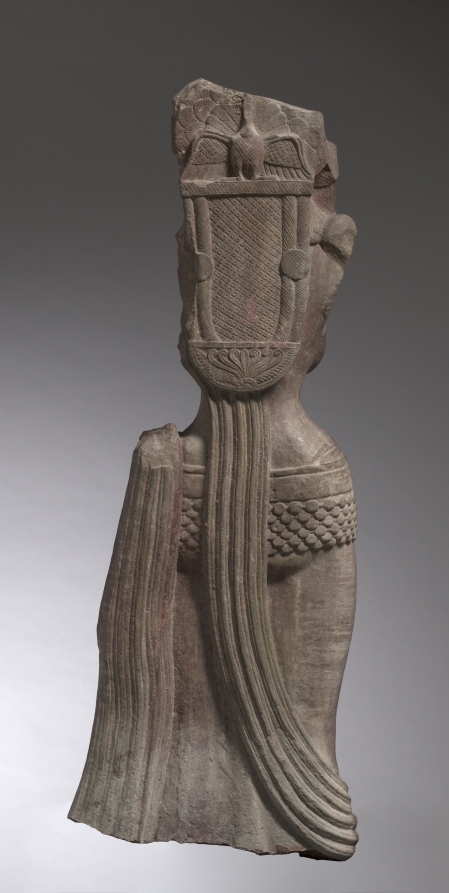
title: Nature Divinity (Yakshi)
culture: India, Mathura, Kshatrapa period (c. 20 BCE–114 CE)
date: c. 75 CE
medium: mottled red sandstone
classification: Sculpture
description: This powerful figure personifies the ideal of the young mother in the form of a nature goddess associated with birth and nourishment. Her iconic stance with the weight equally distributed on both feet indicates that this statue was an object of worship. Her extraordinary headdress, well preserved in the back, and full complement of jewels and ornaments, point to the idea of wealth, which leads to prosperity.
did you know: The prominence of the peacock (enemy of serpents) on the back of her headdress suggests she has the power to protect against snakebite.